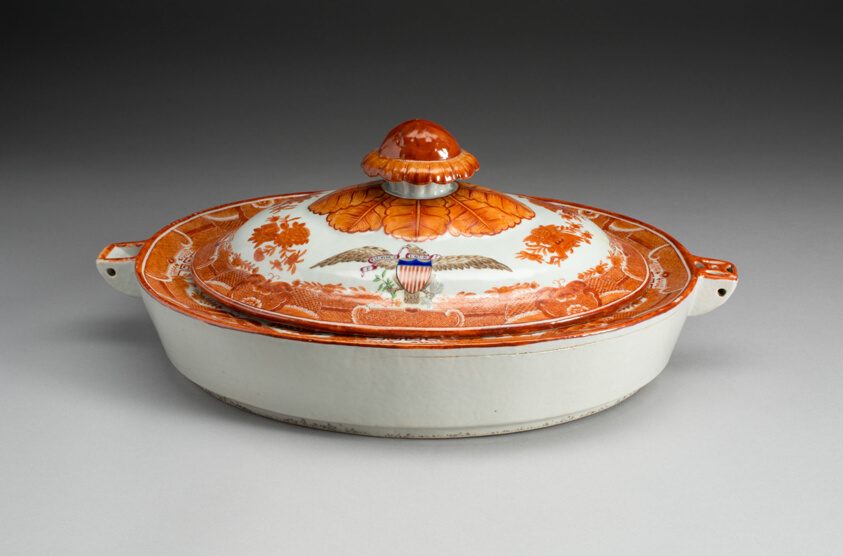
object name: Ceramics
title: Hot Water Dish with Cover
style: chinese export, Chinese (culture or style), East Asian, asian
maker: China; Chinese, made for the American market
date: 1800–1900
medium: Hard-paste porcelain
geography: China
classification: chinese export porcelain; art of the americas; porcelain; european decorative arts; ceramics; decorative arts; American market; pottery